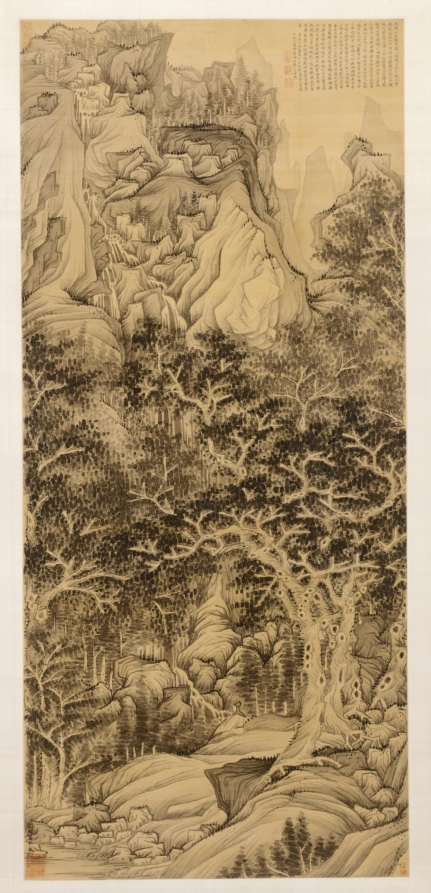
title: The Mountain of Five Cataracts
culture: China, Ming dynasty (1368–1644)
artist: Chen Hongshou (Chinese, 1598/99–1652)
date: c. 1630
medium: hanging scroll; ink on silk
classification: Painting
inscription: Artist's signature and seal at middle right edge: Hongshou [seal] Zhanghou 洪绶 [印]章侯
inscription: Inscription by Gao Shiqi 高士奇 (1645–1704): The Mountain of the Five Cataracts is bordered by three prefectures--Wu [Jinhua], Hang [Hangzhou], and Yue [Shaoxing]--and is quite close to Jiyang [Zhuji] in Yue. The landscape there is extraordinary and precipitous, with ridges and peaks standing in circles. Rocks of strange shapes gaze down everywhere, while maple and bamboo provide shade. The water from five pools overflows and is suspended in five steps--that is why it is called "Five Cataracts." Xie Yuanqing [Xie Tiao 謝朓, c. 464–499] of the Qi Dynasty gathered medicinal herbs here; Diao Jingchun [Diao yue 刁約, 11th century] of the Song Dynasty also visited here; Song Jinhua [Song Lian 宋濂, 1310–1381] and Xu Tianchi [Xu Wei 徐渭, 1521–1593] both wrote travel notes about the place; and Chen Hongshou painted here. His mountains are done in the style of the Six Dynasties masters; the trees are after those of Dong Beiyuan [董源 Dong Yuan, active during the Five Dynasties]--the painting seems to be richly imbued with the primeval spirit. Xu Wei said that the grotto is unique for the shade (yin) and the five cataracts unusual for the sun (yang). There are seventy-two peaks, with a ravine between two cliffs. At times they are bright and at other times, gloomy; sometimes they seem to be open, sometimes closed, yet often border uniquely between shady (yin) and sunny (yang). Zhanghou [Chen Hongshou] really succeeded in capturing that spirit. As a young man indulgently boating through Shanyin [Shaoxing],/ I became familiar with the beauty of the Five Cataracts./ The cold streams, when level, become pools clear as crystal./ Pouring foam mingled with flying waterfall,/ Its shapes constantly changing./ Water would flow downward without a sound,/ Or become raging billows emitting echoes./ Sometimes the wind from the sky would wail,/ The green forest during the day would turn dark./ Sometimes it was dangerous and difficult to ascend,/ For the moss was slippery on the stone steps in those precipitous cliffs./ After reading the travel notes of Sung [Lian] and Xu [Wei],/ I'm afraid their descriptions are incomplete. / Yet when Laolian [Chen Hongshou] was seized with the inspiration to paint,/ His brush and ink moved with exhilaration./ It is as if mists have risen/ From a hot cooking pot, gradually opened./ By hanging this on a plain wall,/ One can clearly listen to the quiet night./ At the end of the year, ice and snow are deep;/ The cold air in the quiet studio is frozen./ Near the fireplace, I make with it a silent, spiritual acquaintance/ Burning incense and striking a lucid qing [stone chime]. On the eighteenth day of the twelfth month in the jimao year of the Kangxi era [1699]. Jiangcun, Gao Shiqi. Zhuchuang inscribed this at Zhe in the Lan Jing studio. It was the third day after the beginning of spring. trans. LYSL/HK/WKH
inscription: Collector's inscription by Gao Shiqi 高士奇 (1645–1704), one column in standard script at the lower left corner: 信天巢秘藏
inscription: 5 seals of Gao Shiqi 高士奇 (1645–1704): 竹窗 Zhu Chuang; 高士奇 Gao Shiqi; 澹人 Danren; 簡靜齋 Jian Jing Zhai (Gao Shiqi's studio; at the upper left corner); 高氏江村草堂珍藏書畫之印 Gaoshi Jiangcun Caotang Zhencang shuhua zhi yin (at the lower left corner).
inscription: Two additional seals at the lower left and right corners are undecipherable.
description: A unique landscape painting in the existing body of Chen Hongshou’s art, this painting reveals his involvement with the practice of fang (imitation) to achieve creative transformation. Chen acquired the tradition stemming from Dong Yuan of the Five Dynasties, with which he sought an artistic individuality that lends his work an idiosyncratic vision and extraordinary power.